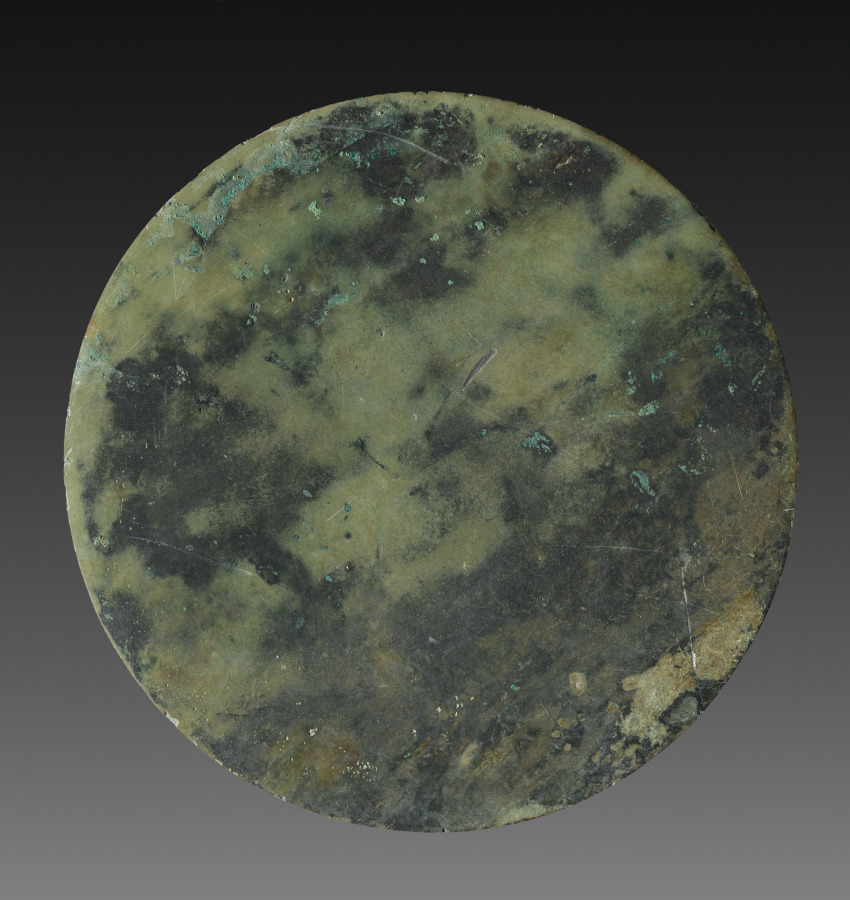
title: Mirror with Pair of Cranes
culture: Japan, Muromachi period (1392–1573)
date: 1392–1573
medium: bronze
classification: Metalwork